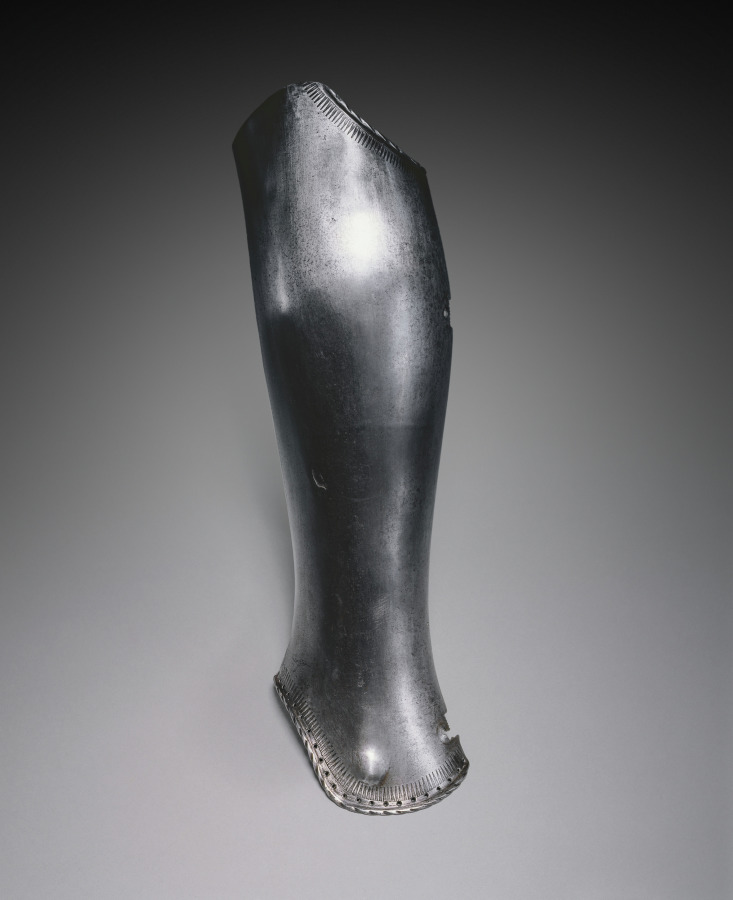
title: Leg Guard (Greave)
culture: Germany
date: 1500s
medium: steelwith roped edge and scroll design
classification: Arms and Armor